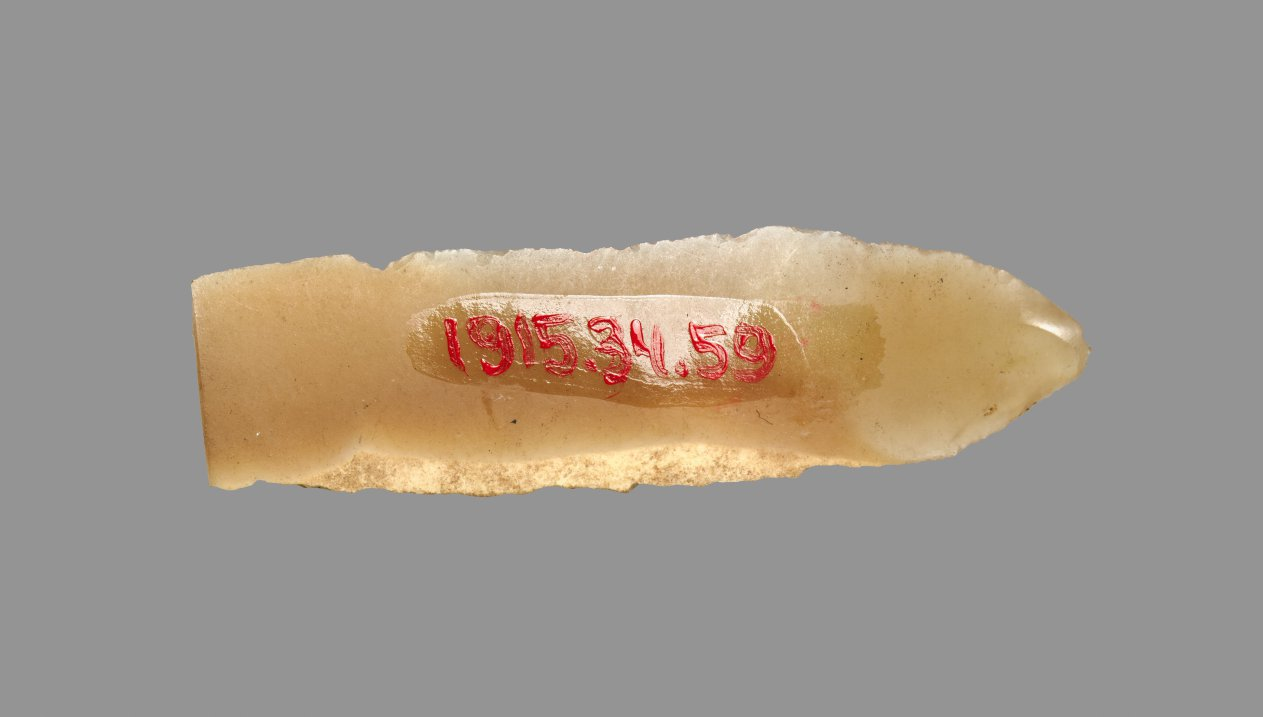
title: Sickle Blade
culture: Egypt, Middle Kingdom (2040–1648 BCE), Dynasty 12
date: 1980–1801 BCE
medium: flint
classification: Implements